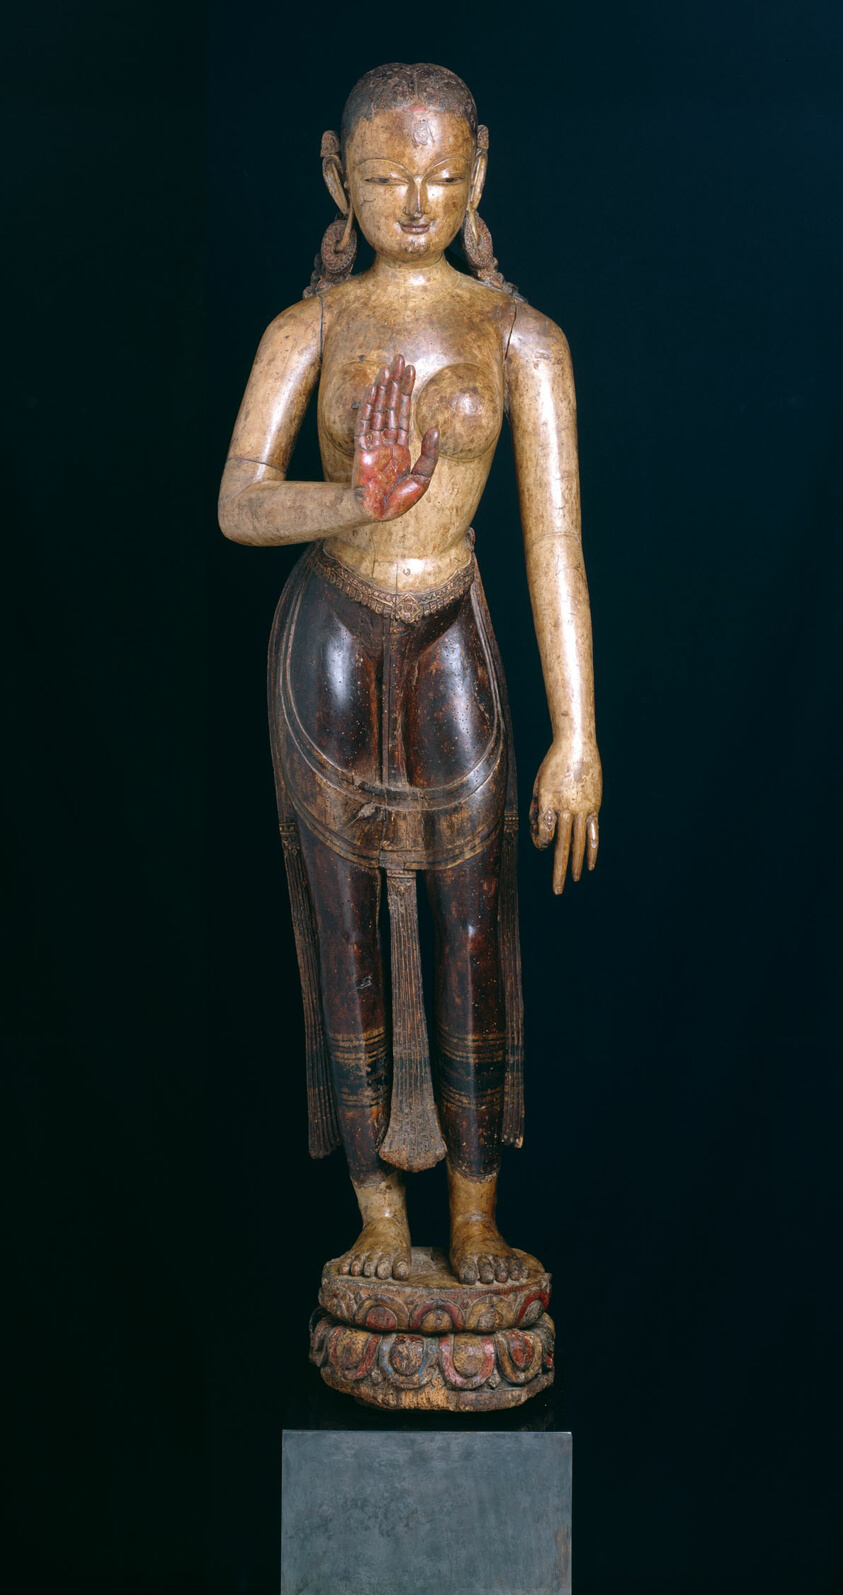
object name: Sculpture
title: Goddess Tara with Hand in Gesture of Reassurance (Abhayamudra)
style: Himalayan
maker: Nepal; Kathmandu Valley, Patan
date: 15th century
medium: Wood and pigments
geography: Kathmandu Valley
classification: wood; sculpture; asian art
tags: goddesses